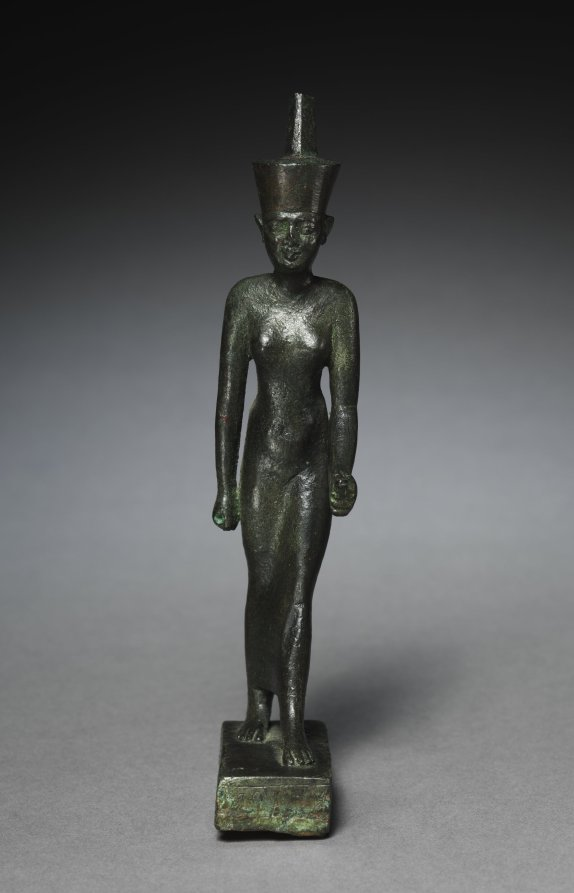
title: Statuette of Neith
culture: Egypt, Greco-Roman period (332 BCE–395 CE), Ptolemaic dynasty (305–30 BCE)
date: 305–30 BCE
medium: bronze, solid cast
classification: Sculpture